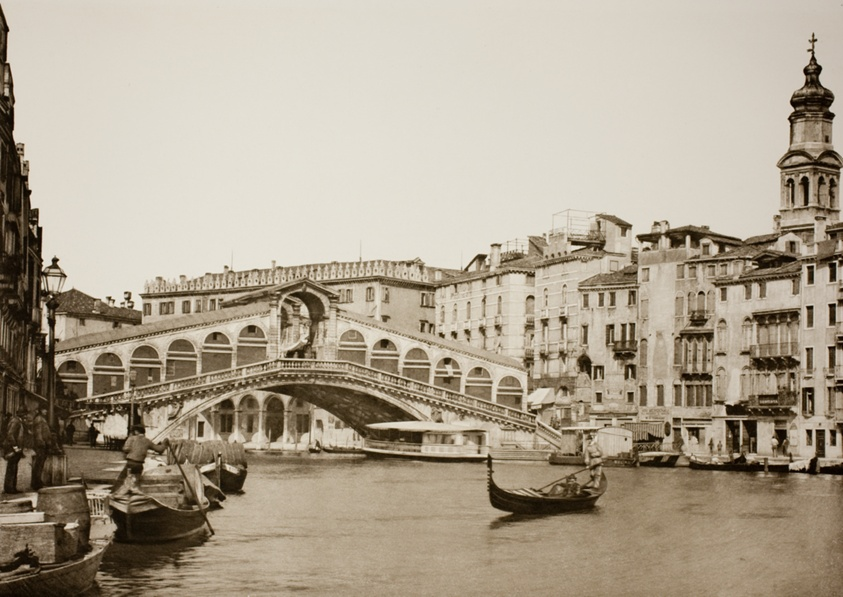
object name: Photograph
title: Untitled (93)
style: 19th century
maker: edited by Ferdinando Ongania; Italian, 1842–1911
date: c. 1890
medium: Photogravure, No. 93 from the portfolio "Calli, Canali e Isole della Laguna"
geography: Italy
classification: photograph; photography